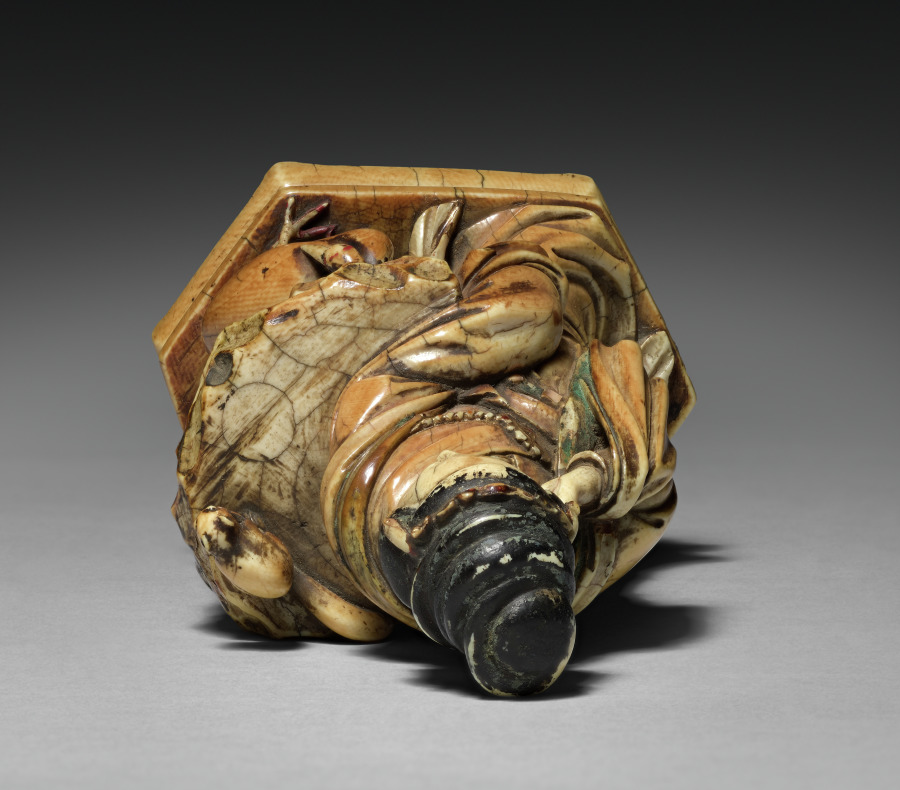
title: Female Figure with Crane and Squirrel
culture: China, Qing dynasty (1644-1911), Kangxi reign (1662-1722)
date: 1662–1722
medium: ivory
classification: Ivory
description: In the Qing dynasty (1644–1911), luxury items became more affordable to larger parts of the society, including women, merchants, and literati in non-official positions. Imperial patronage and a growing urban population encouraged consumption of luxury goods and local craftmanship. This ivory form of a woman with a crane illustrates the superb skills and the creative mind of the talented artisan who sought clients on a competitive market.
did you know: The ivory has aged to a rich amber, while traces of its original red and green paint remain on the woman’s cuffs and collar.